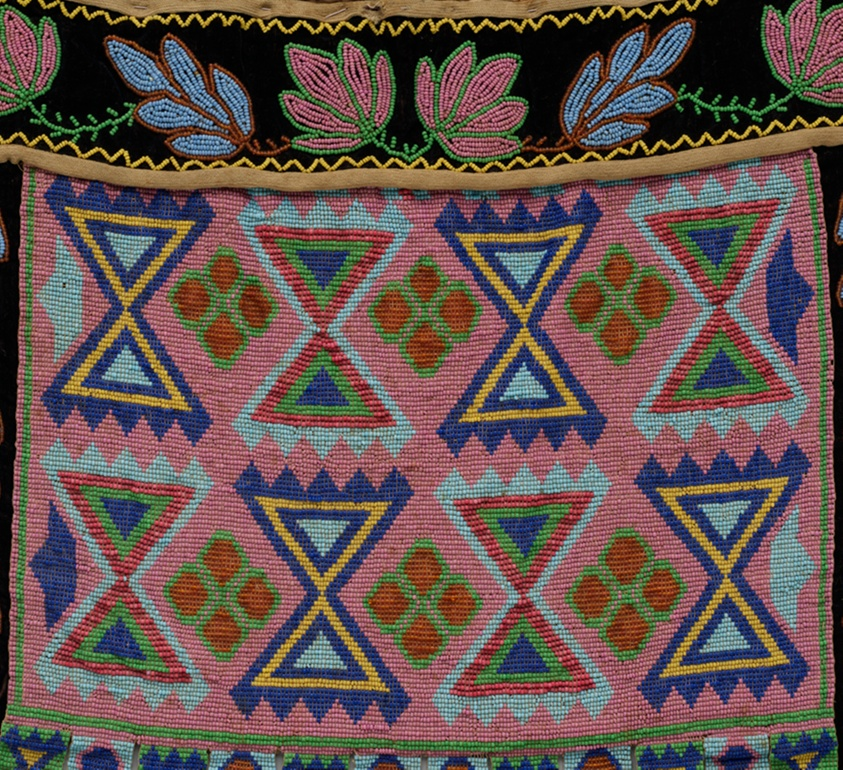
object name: Costume and Accessories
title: Man's Shoulder Bag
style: potawatomi, native american, americas, Arts of the Americas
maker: Maker unknown (Potawatomi); Great Lakes region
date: Mid–late 19th century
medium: Cotton, velvet, yarn, and glass seed beads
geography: Great Lakes Region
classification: beadwork; costume accessory; costume; art of the americas